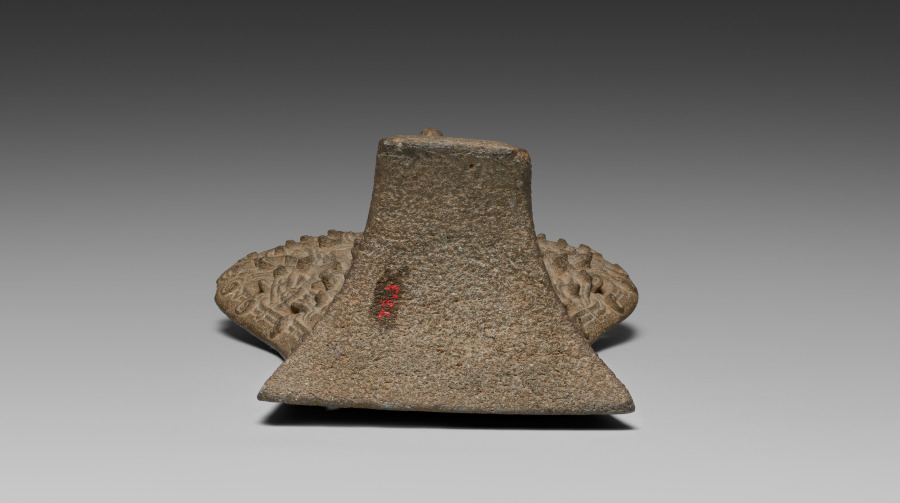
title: Ballgame Palma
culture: Mexico, Gulf Coast, Classic Veracruz style (600-1100)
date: c. 900–1100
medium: stone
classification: Sculpture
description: Stone palmas—so-called today for their palm frond-like shape—are ceremonial sculptures that may replicate lightweight gear worn over the chest during the ballgame. The scene on the back of this palma vividly illustrates the tie between the ballgame and sacrifice. A bat descends from the top, clutching severed human body parts, and at the center an upright figure brandishes a blade over a reclining victim. The scene's many animal figures, including the one on the front, may belong to ballgame mythology that now is lost.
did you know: The Mesoamerican ballgame was played with a hard rubber ball that players bounced off their hips.